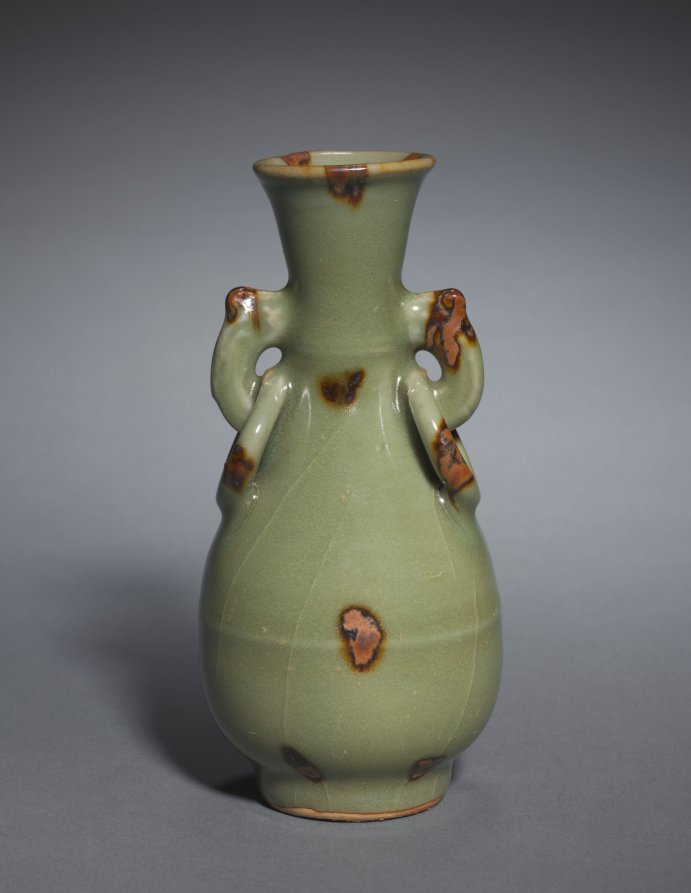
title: Bottle Vase with Ornamental Ring Handles: Longquan Ware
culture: China, Zhejiang province, Yuan dynasty (1271-1368)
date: 14th Century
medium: glazed porcelain with molded decoration and iron spots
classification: Ceramic